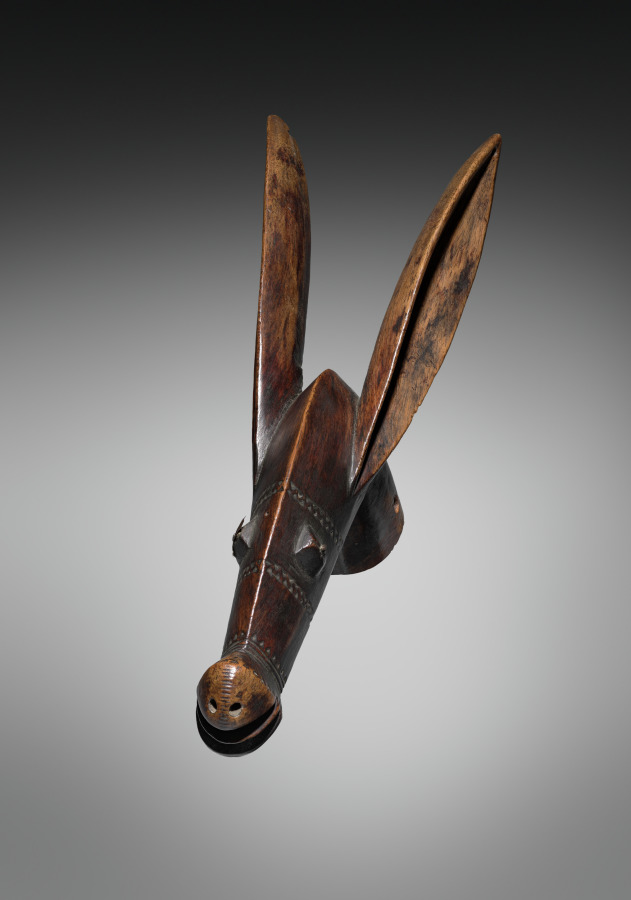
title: Head of a Hobbyhorse (korèdugaso)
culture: Africa, West Africa, Mali, Bamana blacksmith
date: late 1800s–early 1900s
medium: Wood and iron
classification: Sculpture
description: Pertaining to the male initiation society called Korè, this sculpture from the Koulikoro region represents the head of an aardvark and is part of a wooden hobbyhorse that is mounted by a ritual buffoon. The Korè initiates are divided into different classes, each having a designated mask. The ritual buffoons appear in pantomimes on different public occasions and poke fun at village authorities and other high-ranking individuals.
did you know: This is one of the best-known examples of a korèdugaso. It was featured on the catalogue cover for a 1935 exhibition at the Museum of Modern Art, one of the first on African arts in the US. It traveled to the CMA that same year.